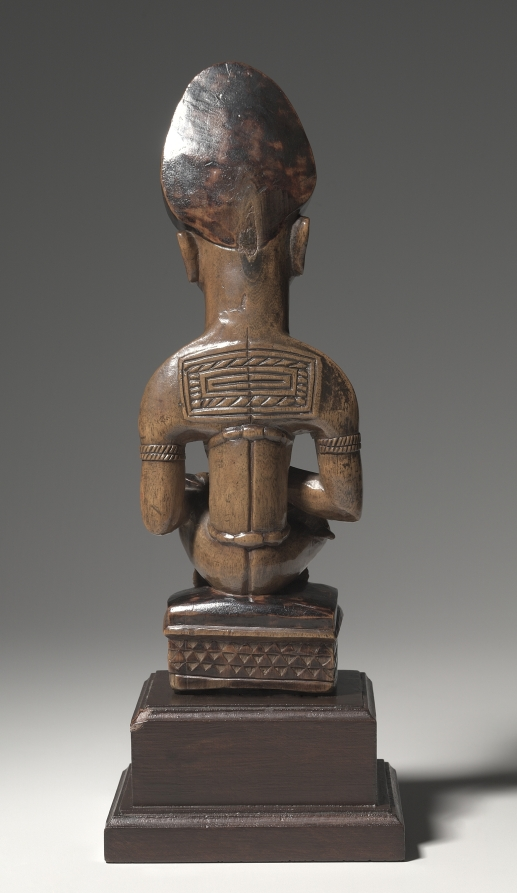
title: Woman and Child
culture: Africa, Central Africa, Democratic Republic of Congo, Yombe-style carver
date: mid- to late 1800s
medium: Wood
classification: Sculpture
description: This mother-and-child figure was probably part of a cult concerned with the treatment of infertility. Both her jewelry and her seated pose indicate that the woman occupied a high rank in her community. Her miter-shaped hairstyle, chiseled teeth, and raised body scars--considered to be marks of beauty and perfection--signal that the woman incarnates the founding ancestor of a kinship group.